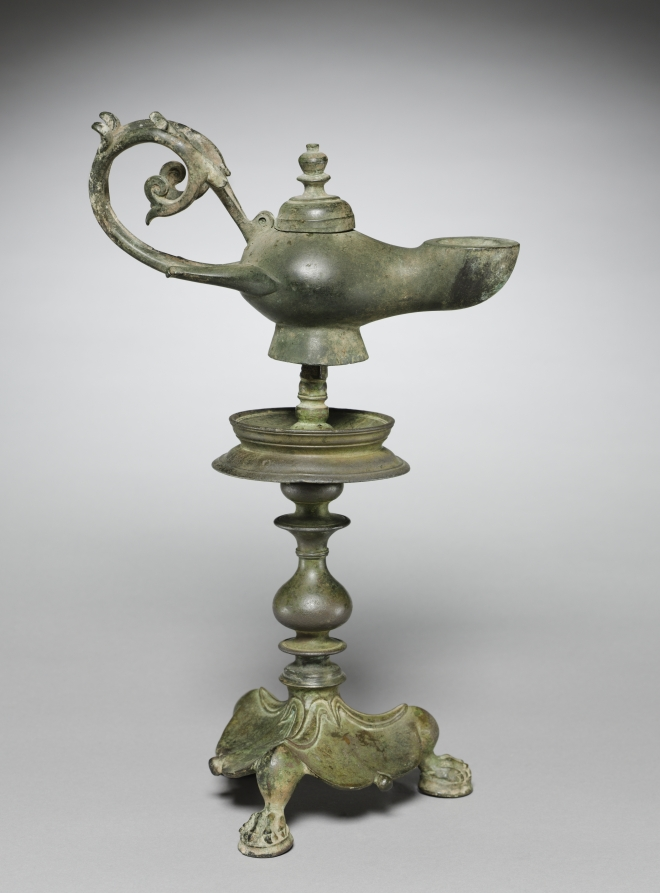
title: Lamp and Stand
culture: Byzantium, early Byzantine period, 5th century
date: 400s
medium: bronze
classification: Metalwork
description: Bronze oil lamps were made either with stands, like the nearby example, or with chains for suspension on hooks within homes and churches. This lamp is cast in the form of a griffin, a guardian figure from antiquity frequently used in Byzantine churches, which contained much wealth. The Christian monogram on the handle indicates the lamp was intended for use within a church.